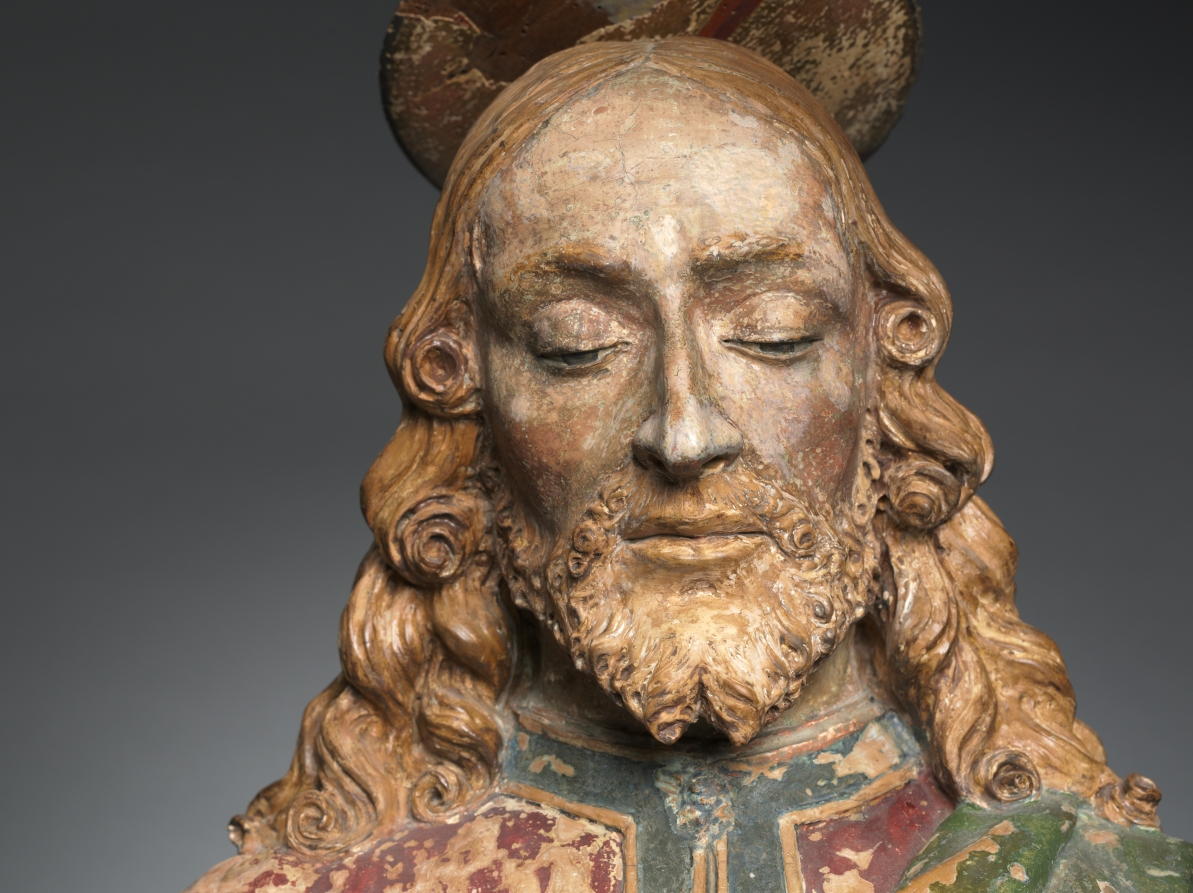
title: Bust of Christ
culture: Italy, Florence, 15th century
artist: workshop of Andrea del Verrocchio (Italian, 1435–1488)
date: c. 1470–1500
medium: painted terracotta and wood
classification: Sculpture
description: In the late 1400s Andrea del Verrochio set up a large workshop where he and his assistants reproduced copies of his sculpture and other works for a middle-class market. Originality was not the objective; in fact, most people were only interested in purchasing replicas of well-known works. This sculpture was modeled after Verrocchio's Christ figure in the bronze sculpture group Christ and St. Thomas at Orsanmichele in Florence, Italy. The medium of terracotta, which was cheaper than bronze or marble, made it possible to offer copies at a reasonable price. Additionally, workshop practices reduced the cost of the work by reducing labor time. Assistants were usually responsible for the shaping of the torso and garments, while Verrocchio was often in charge of executing the facial features and hair. In this sculpture the torso is out of proportion, and the general discrepancy in quality between the parts of the sculpture is due to the fact that it is a workshop production. Given that the facial features are so well executed and the statue retains a stirring motional quality, a trademark of Verrocchio's style which artists found hard to duplicate, it is probable that this sculpture was made in Verrocchio's studio, possibly even with active involvement by the artist on the head.